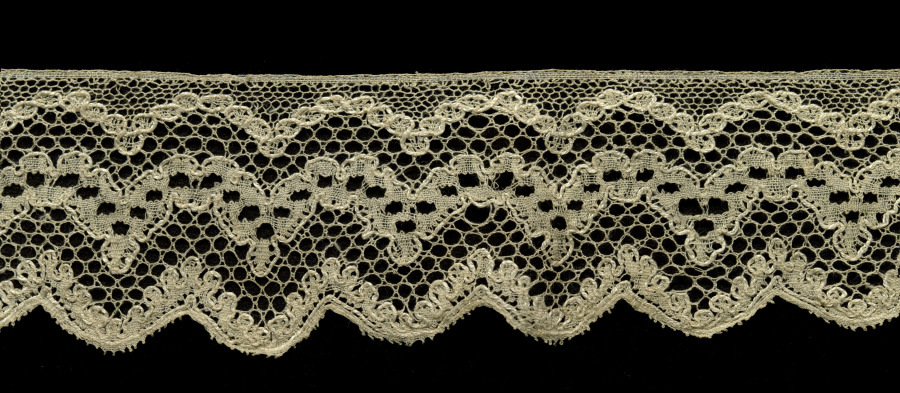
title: Lace Edging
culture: England, Buckinghamshire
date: 1800s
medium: Bobbin lace outlined with silk cordonnet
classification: Lace